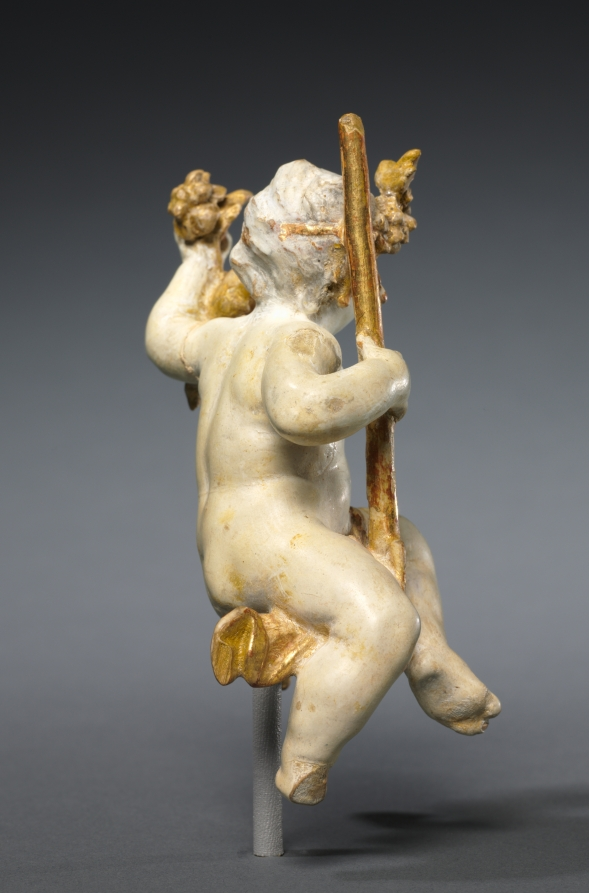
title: Putto as Spring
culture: Germany, 18th century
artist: Ferdinand Tietz (Austrian, 1708–1777)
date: c. 1765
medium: painted and gilded wood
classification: Sculpture